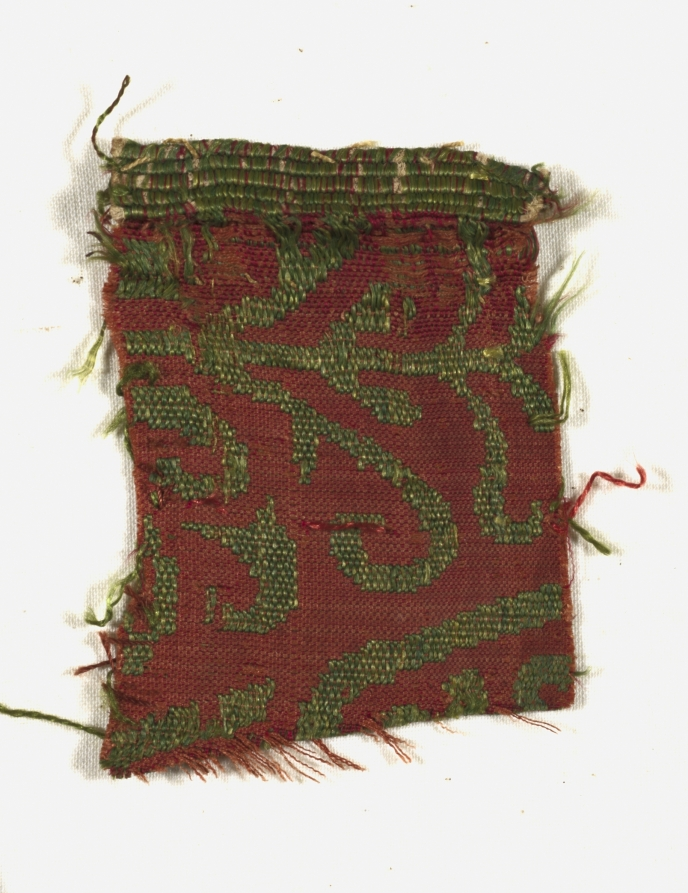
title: Silk Fragment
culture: Spain, Islamic period or Mudejar, 13th century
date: 13th century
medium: lampas weave, brocaded; silk and gold thread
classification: Textile